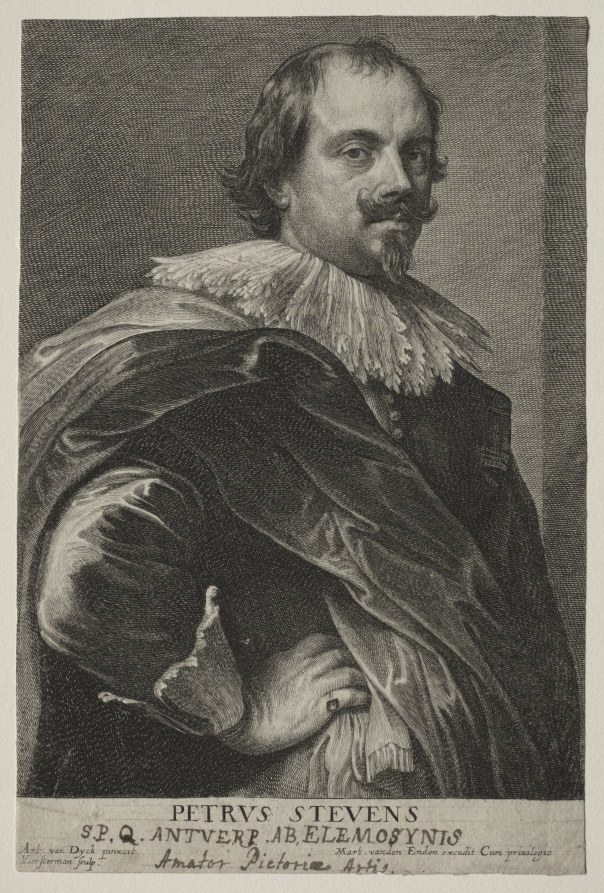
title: Portrait of Peter Stevens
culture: Flanders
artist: Lucas Emil Vorsterman (Flemish, 1595–1675)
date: 1600s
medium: etching and engraving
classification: Print